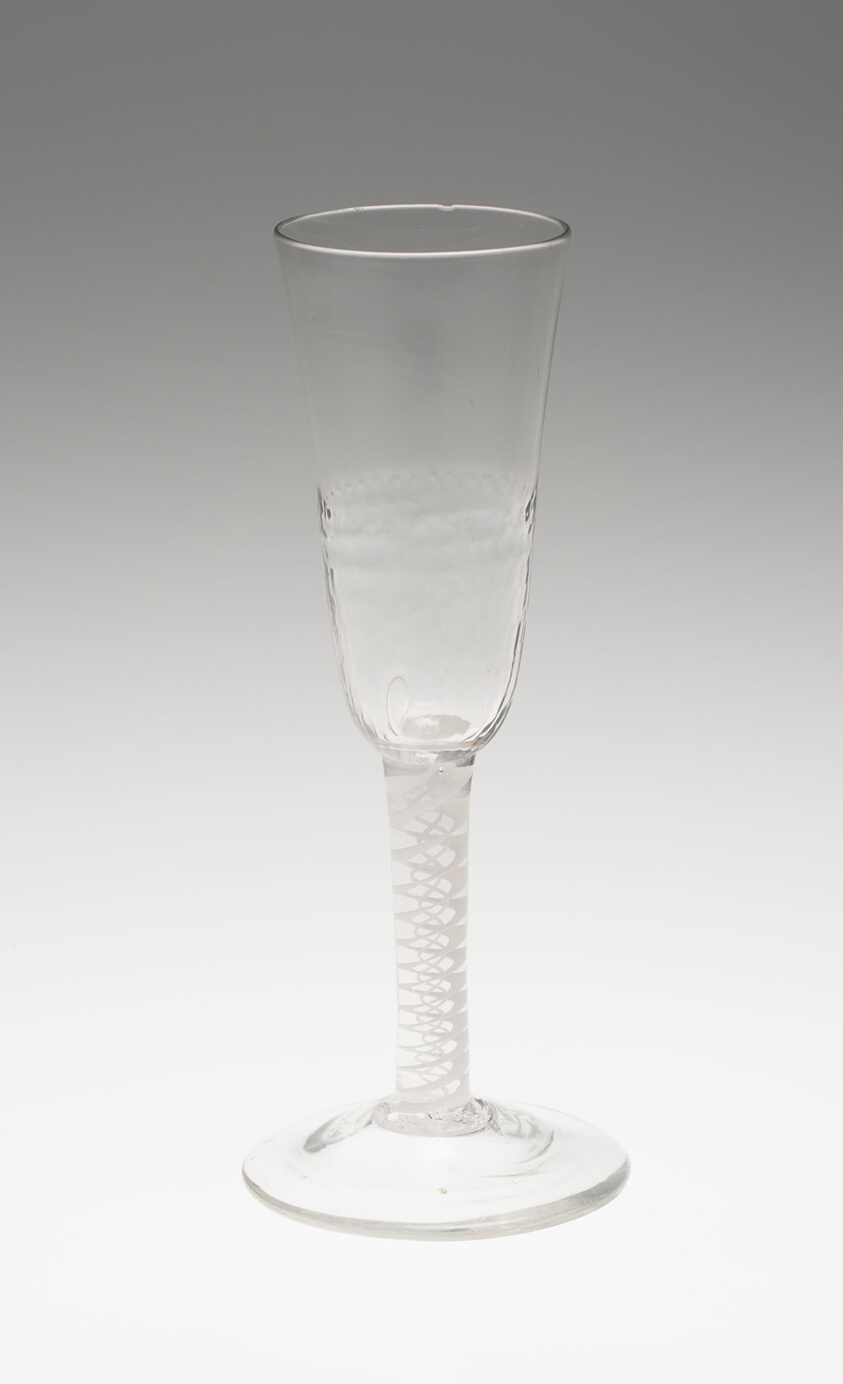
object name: Glass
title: Toasting Ale Glass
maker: England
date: c. 1760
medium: Glass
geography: England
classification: drinking vessel; glass